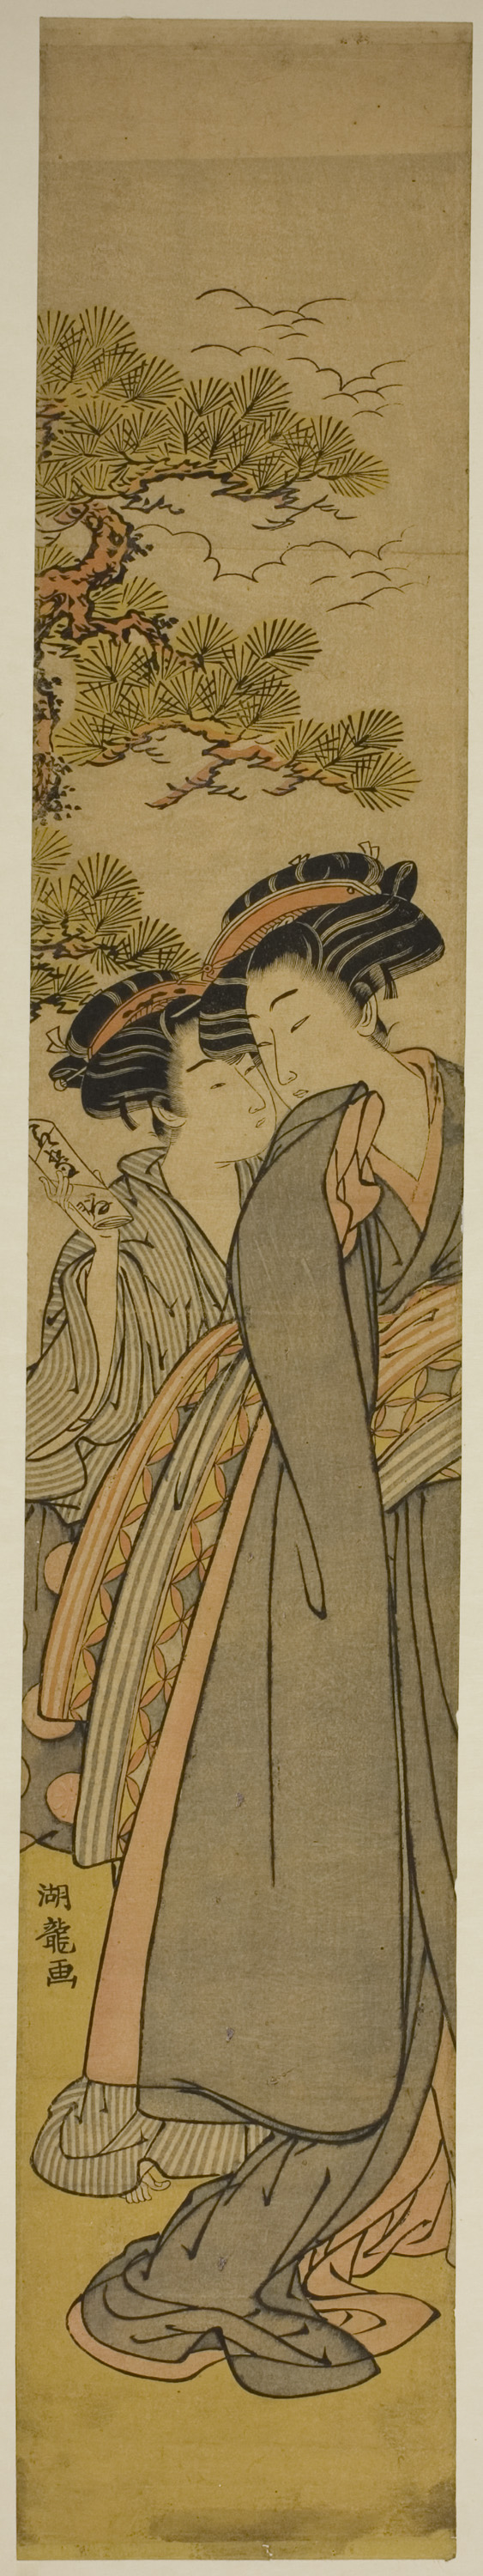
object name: Print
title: Delivering a Love Letter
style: Japanese (culture or style)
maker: Isoda Koryusai (Japanese, 1735-1790)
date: c. 1777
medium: Color woodblock print; hashira-e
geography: Japan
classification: woodblock print; print; asian art